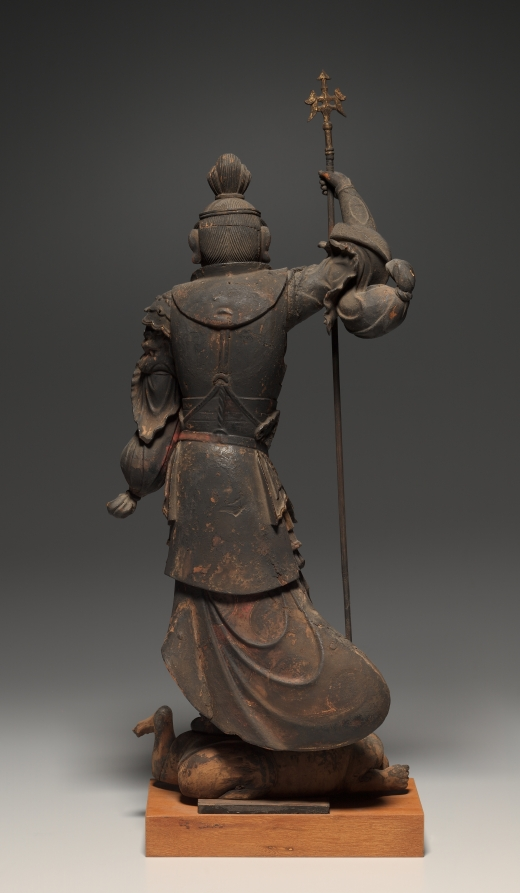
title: Guardian King of the North (Bishamonten)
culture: Japan, Kamakura period (1185–1333)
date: 1185–1333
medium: wood with gold polychromy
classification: Sculpture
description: In Buddhism, Bishamonten is one of four kings who protect the cardinal directions. He stands with a stupa symbolizing the Buddhist teachings and relics of the Buddha in the palm of his left hand, and a spear to foil the enemies of Buddhism in his right. He crushes a demon beneath his feet.